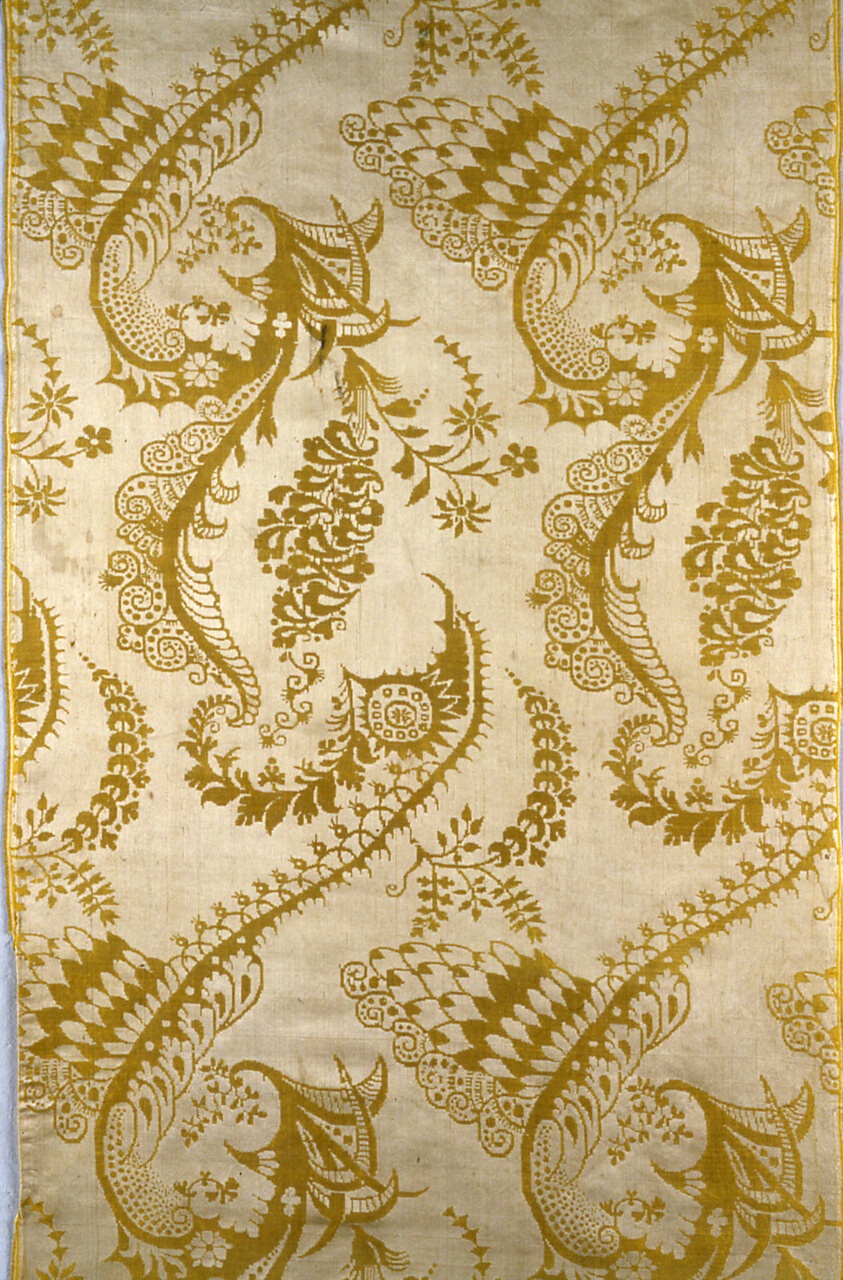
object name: Textile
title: Panel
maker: England or Netherlands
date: c. 1708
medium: Silk, warp-float faced 4:1 satin weave self-patterned by areas of weft-float faced 4:1 twill weave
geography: England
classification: textile; weaving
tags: flowers